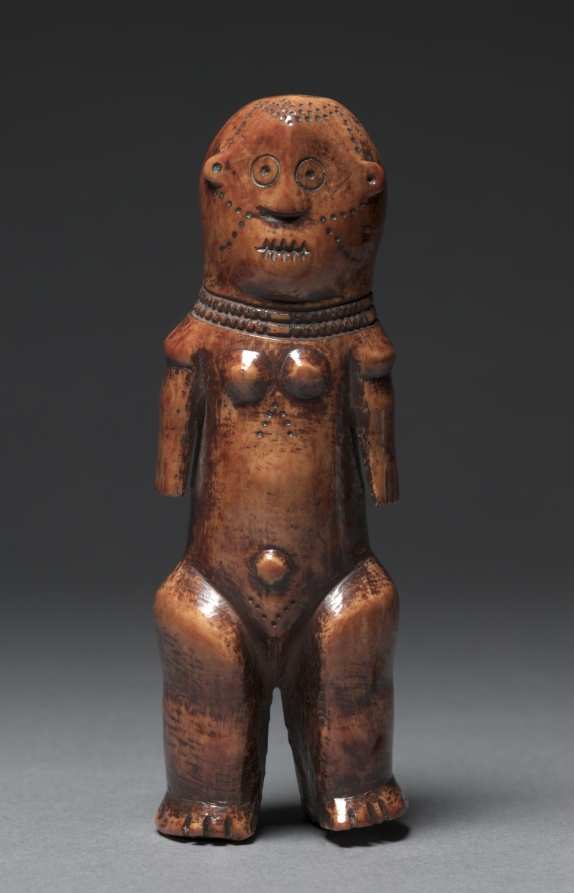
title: Figure (iginga)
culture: Africa, Central Africa, Democratic Republic of Congo, Lega-style maker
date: probably 1800s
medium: Elephant ivory, tukula, and oil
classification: Sculpture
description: The life of Lega men and women is structured around their advancement through the different grades of the Bwami association. Fulfilling political, social, religious, and other roles, the members’ ultimate purpose is the pursuit of wisdom and excellence. Ivory figurines were reserved for members of the two highest Bwami grades, in which the core of the Lega’s moral philosophy is revealed.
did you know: The dark surface (patina) of this sculpture comes from years of handling and the application of oil and a red powder called tukula; it was originally cream-colored!